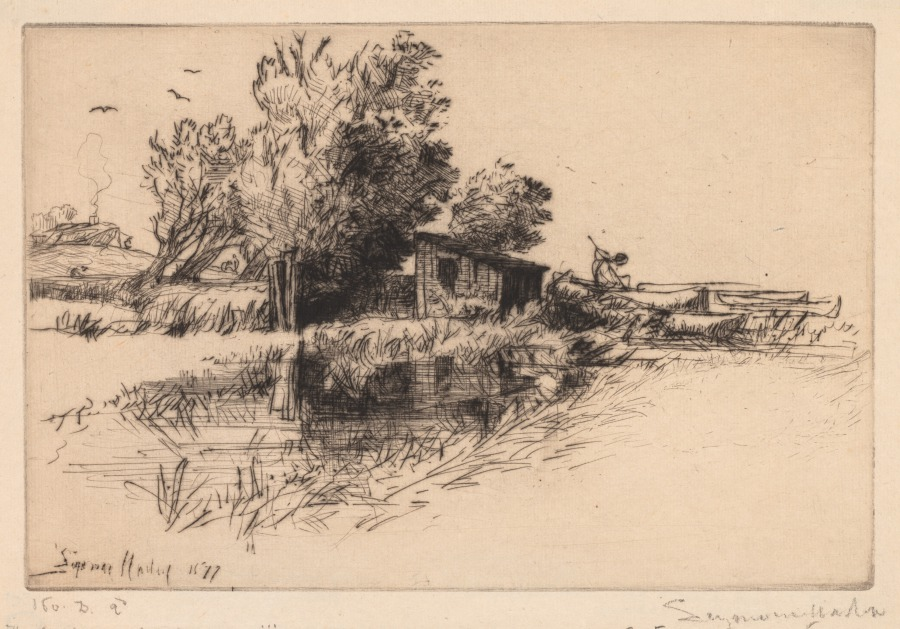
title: The Little Boathouse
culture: Britain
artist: Francis Seymour Haden (British, 1818–1910)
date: 1877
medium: drypoint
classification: Print